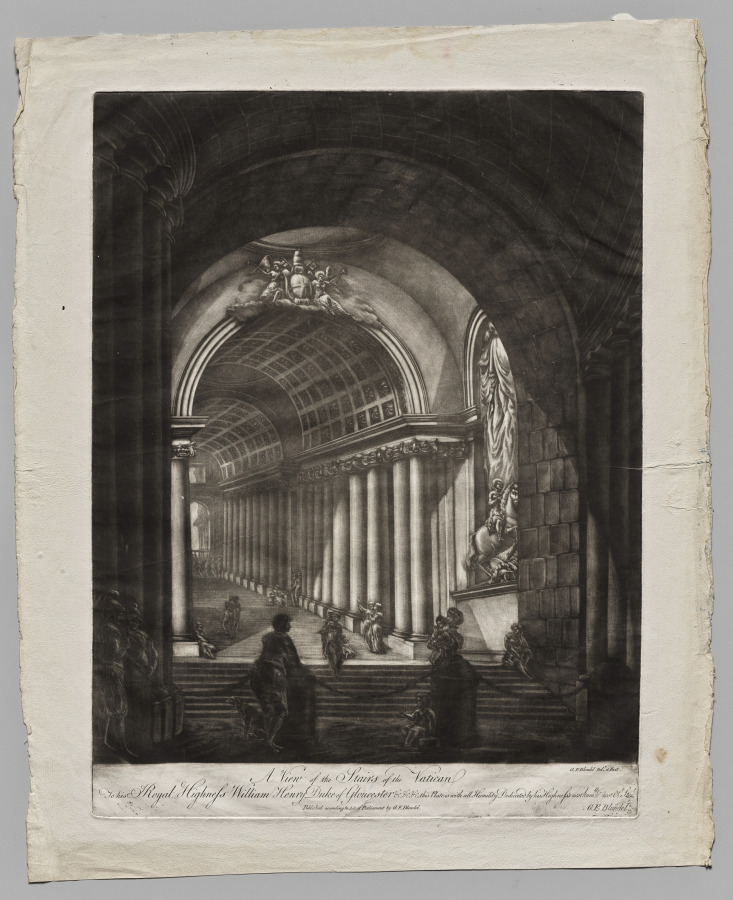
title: A View of the Stairs of the Vatican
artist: Georges Francois Blondel (French, 1730–1800)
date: 1766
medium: mezzotint printed in black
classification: Print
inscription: Imprinted on recto: “A View of the Stairs of the Vatican”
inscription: Imprinted on recto: “G.F. Blondel Del el Fecit.”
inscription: Imprinted on recto: “To his Royal Highness’ William Henry Duke of Gloucester Hc.Hc.Hc. this plate is with all Humility Dedicated by his Highness’s most humble and most ob [illegible]?/Published according to Act of Parliament by G.F. Blondel/G.F. Blondel”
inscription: Watermark: Grand-Jésus stock of T. Dupuy, watermark Name of Jesus (IHS), countermark T Dupuy Fin Auvergne 1742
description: After returning from several years spent in Italy, the French printmaker George-Francois Blondel settled in London in order to take advantage of the English taste for images of Italian sites. This is one of a series of eight prints he published in 1766 depicting imagined and real Italian interiors. Using the relatively new technique of mezzotint, which creates velvety, dark tonal areas, as well as low vantage points, Blondel created towering, awe-inspiring spaces. For special patrons, he printed the plates in sepia ink, rather than in black; the CMA’s set includes two of these unusual sepia impressions.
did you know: Mezzotint was relatively new at the time this print was made and had yet to be utilized for such large plates of an architectural nature as seen here.